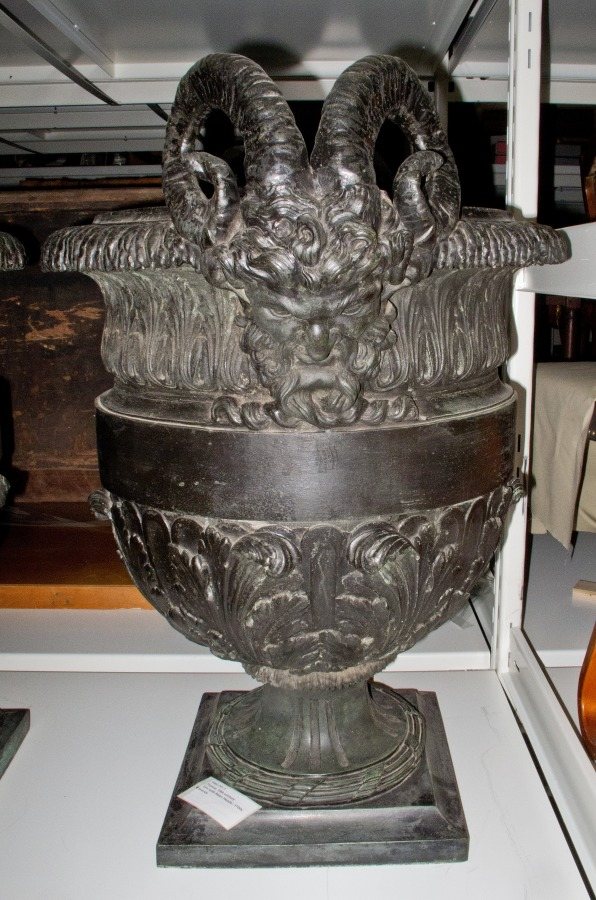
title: Pair of Urns with Satyr Heads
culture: France, 18th century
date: 1700s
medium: bronze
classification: Metalwork